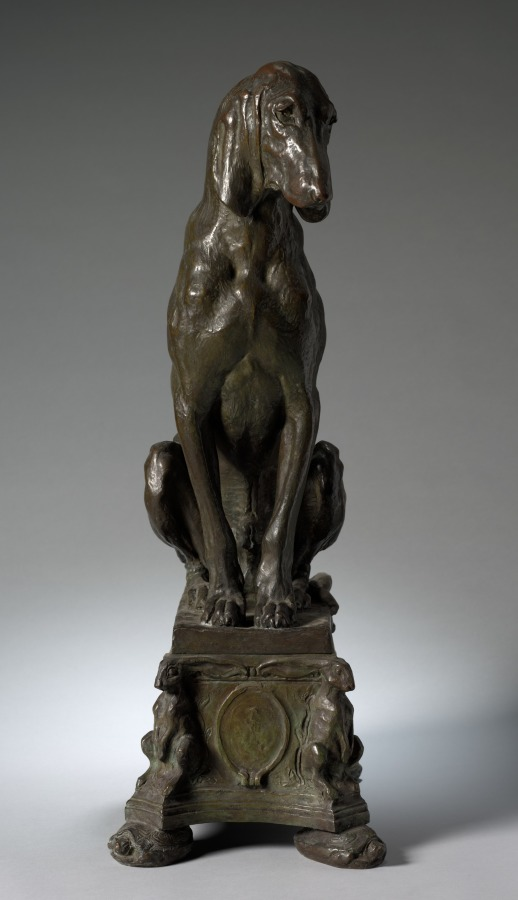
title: Hound (2 of 2)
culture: America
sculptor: Charles Cary Rumsey (American, 1879–1922)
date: 1912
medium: bronze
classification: Sculpture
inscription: Signed on plinth: © C. C. Rumsey